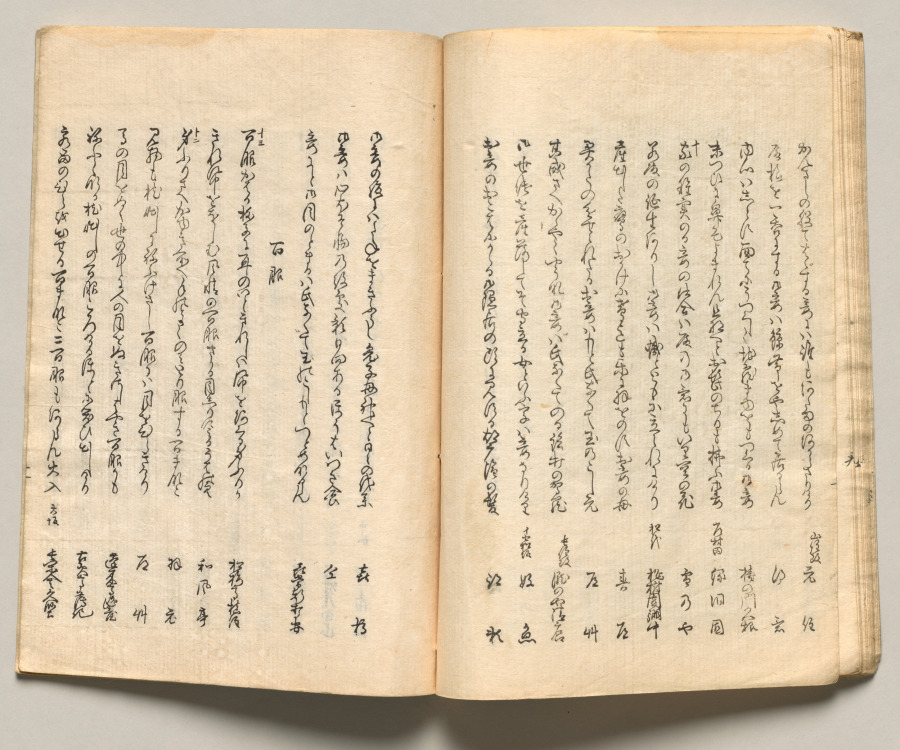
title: Spread Eighteen from Volume Five of People of Japan in Light Verse (Kyōka)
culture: Japan, Edo period (1615–1868)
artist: Utagawa Hiroshige (Japanese, 1797–1858)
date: 1857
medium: Woodblock-printed book; ink and color on paper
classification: Bound Volume